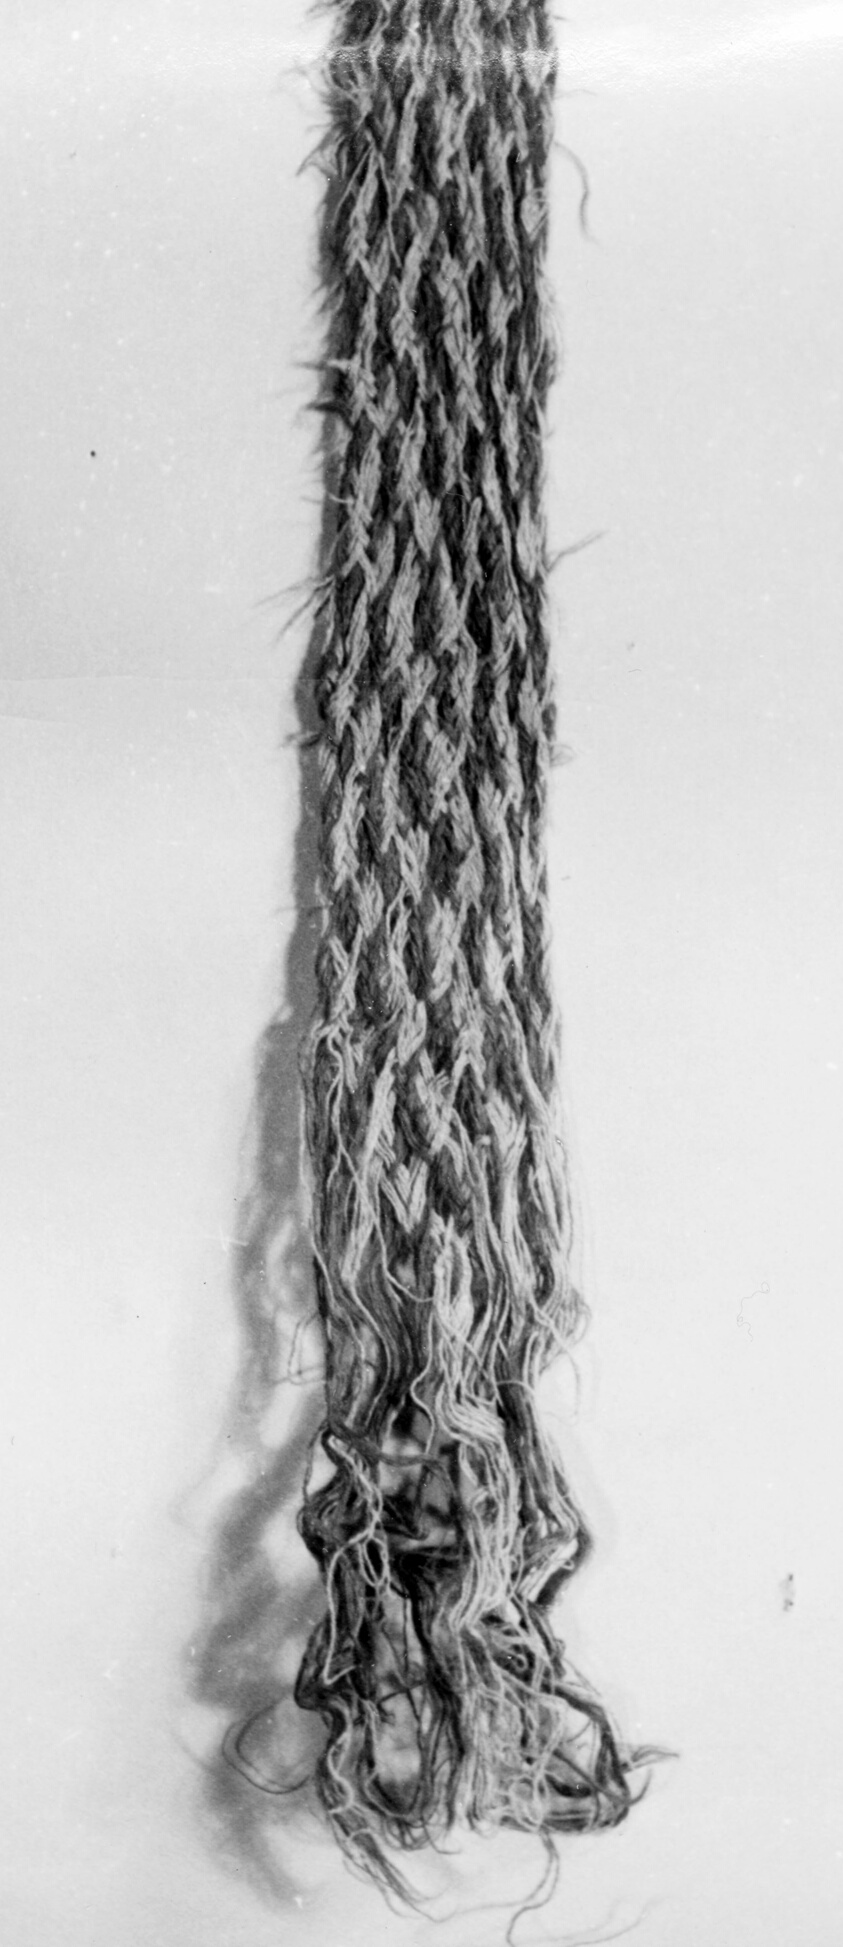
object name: Textile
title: Band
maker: Peru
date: 1/1532 A.D.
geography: Peru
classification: textile; weaving